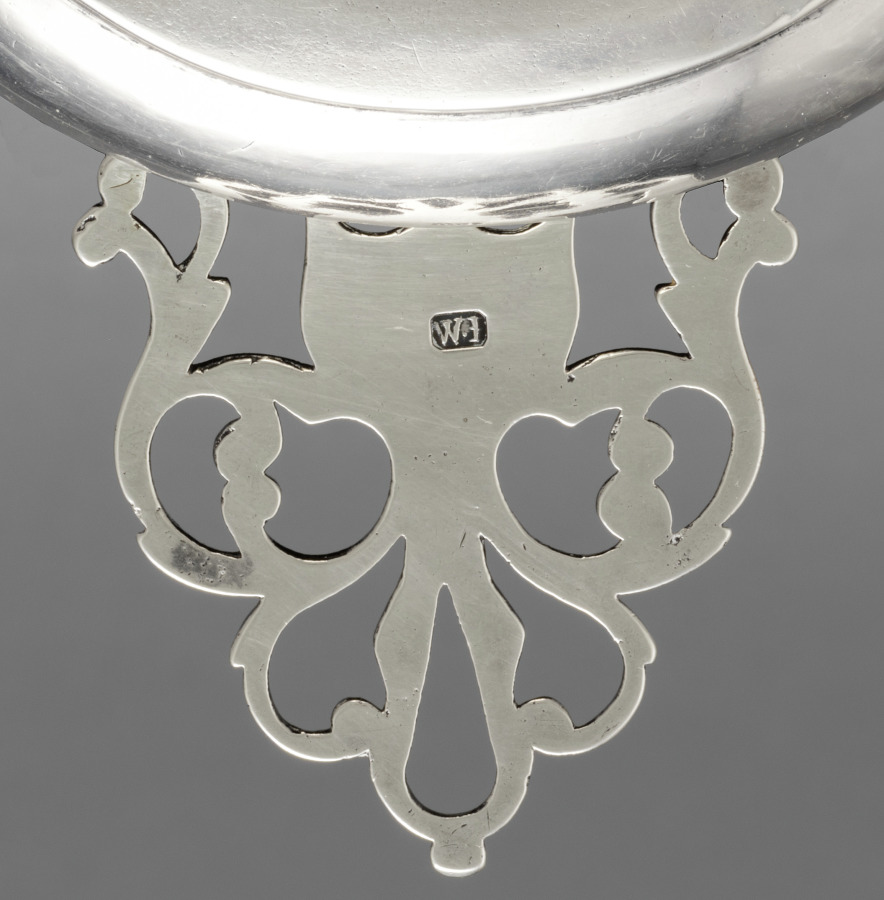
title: Porringer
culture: America, Massachusetts, Marblehead, 18th century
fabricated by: William Jones (American, 1694–1730)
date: 1725–1730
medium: silver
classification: Silver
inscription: engraved "D" over "H * A" in cross-hatched block initials on top of handle.